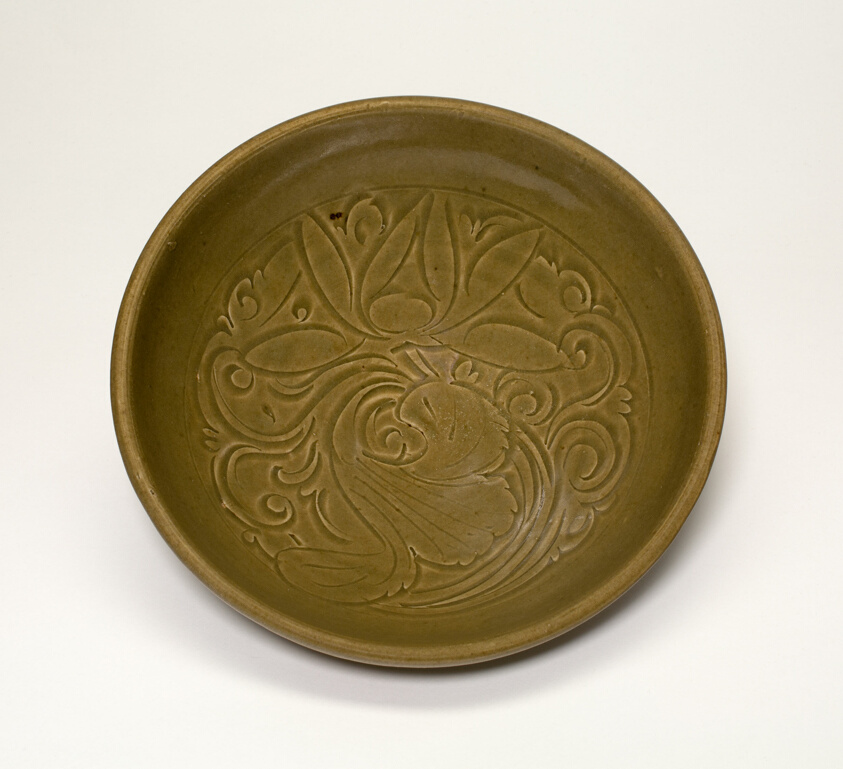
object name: Vessel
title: Bowl with Lotus Design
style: Chinese (culture or style)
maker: China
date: Jin dynasty (1115–1234), 12th/13th century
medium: Yaozhou ware; stoneware with underglaze carved and incised decoration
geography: China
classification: bowl; dish (vessel); asian art; ceramics; vessel